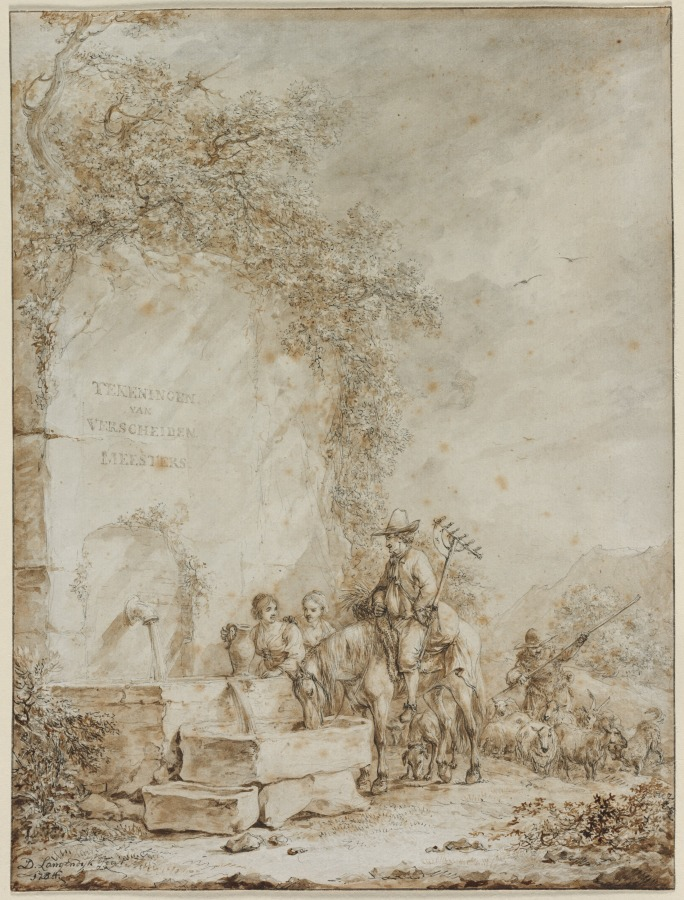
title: Frontispiece for an Album of Drawings: Peasants at a Fountain (recto); Sketch of Peasants at a Fountain (verso)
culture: Netherlands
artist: Dirk Langendijk (Dutch, 1748–1805)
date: 1784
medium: pen and black ink and brush and brown and gray wash over graphite; framing lines in black ink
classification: Drawing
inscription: signed, lower left, in black ink: D. Langendyk Fecit / 1784 ; by artist, center left, in graphite reinforced with brush and brown wash: TEKENINGEN / VAN / VERSCHEIDEN / MEESTERS [=Drawings by Various Masters]